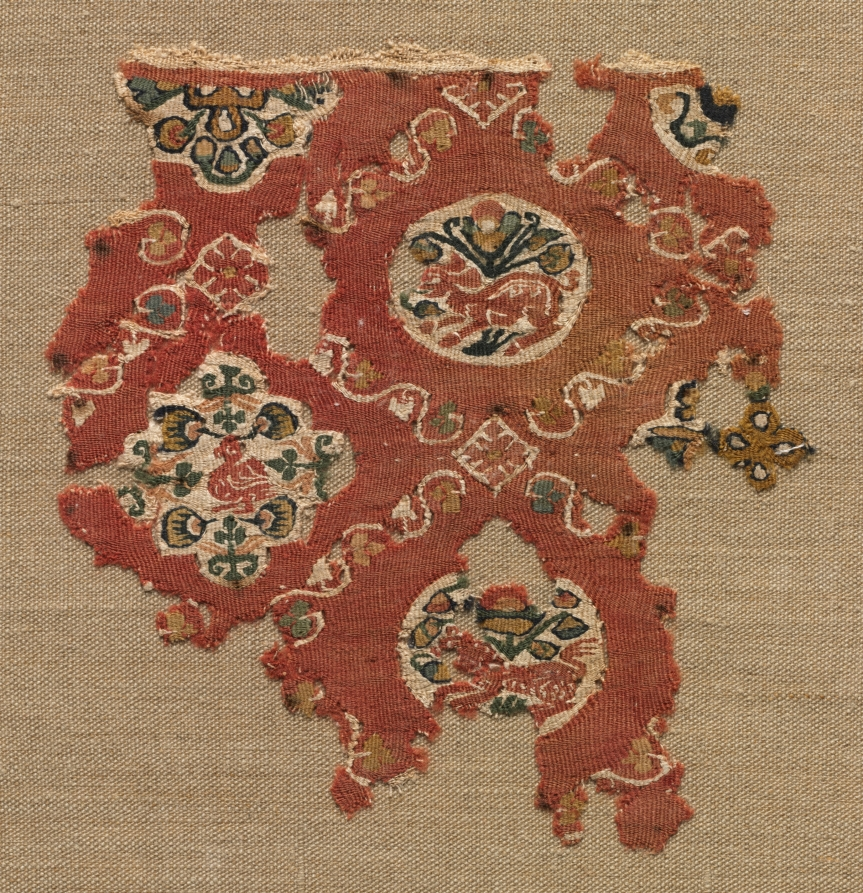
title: Tapestry with lattice of animals in medallions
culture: Egypt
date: 600s–700s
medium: wool and linen: tapestry weave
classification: Tapestry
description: This is a fragment from an horizontal band that was woven to be applied as a decoration to a garment. It has diamond compartments containing floral, geometric, and animal motifs.